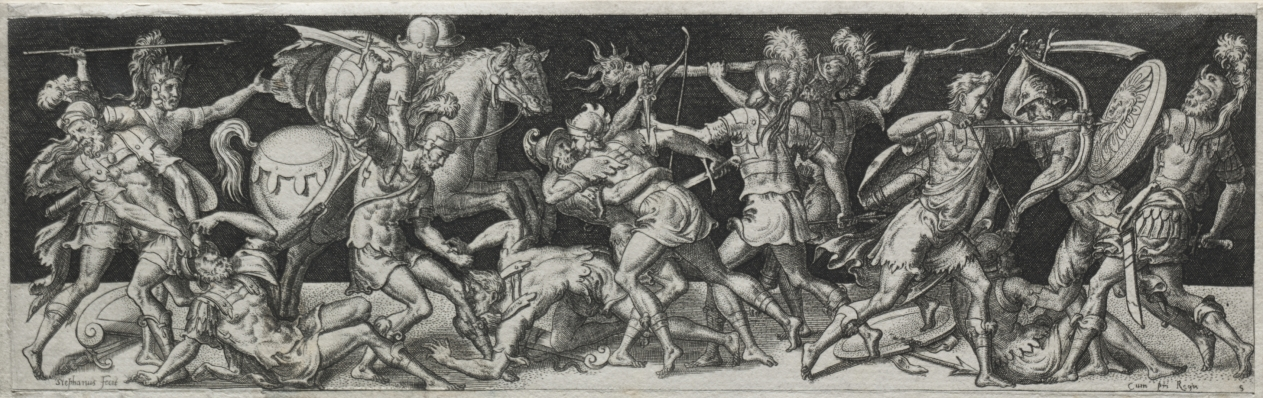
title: Combats and Triumphs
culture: France, 16th century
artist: Etienne Delaune (French, 1518/19-c. 1583)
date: probably 1560s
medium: engraving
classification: Print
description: Etienne Delaune (French, 1518/19-1583) Combats and Triumphs, probably 1560s Engravings Gift of Leonard C. Hanna 1924.671-.674 The Triumph of Bacchus Battle of Men and Animals Combat of the Naked Men Battle of the Centaurs and the Lapiths The four prints shown here come from a series of twelve known as the Combats and Triumphs. The friezelike composition reflects the artist's study of marble relief carvings on Greek and Roman sarcophagi (coffins), here reduced to a preciously small setting. Against a flat, stagelike background, Delaune's balletic warriors engage in a Mannerist version of artificial war. Etienne Delaune was inspired by the art created at Fontainebleau, but he worked in Paris and then Strasbourg during the late 1500s. His small, exquisitely executed engravings reflect his training as a goldsmith and his work as a medallist.